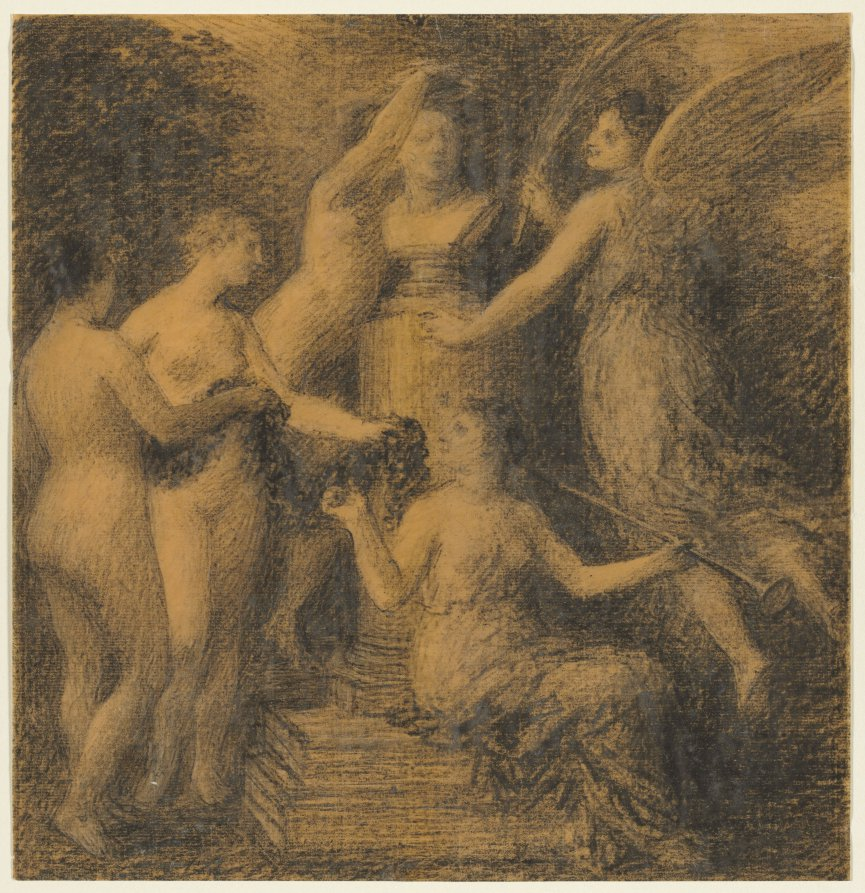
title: Homage to Rossini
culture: France, late 19th-early 20th Century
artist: Henri Fantin-Latour (French, 1836–1904)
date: 1902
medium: black chalk (or lithographic crayon?) with stumping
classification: Drawing